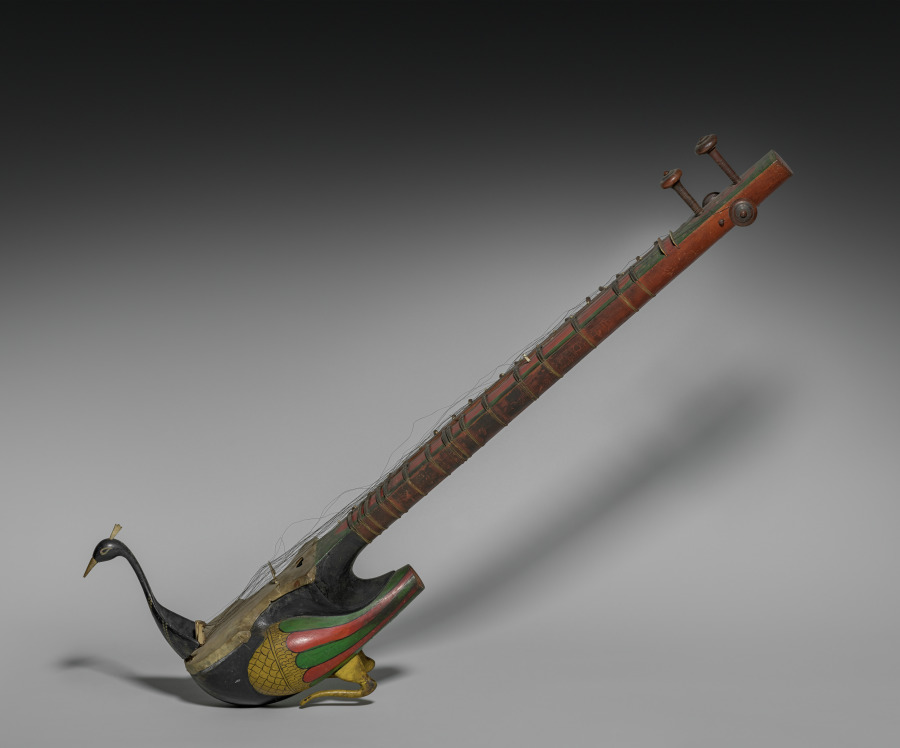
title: Taus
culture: India, Punjab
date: c. 1800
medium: Polychromed wood, parchment, bone or ivory, gut, and metal strings; frets: bronze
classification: Musical Instrument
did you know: The taus was designed by a Sikh Guru to combine the sounds of string instruments and the plaintive cry of the peacock.